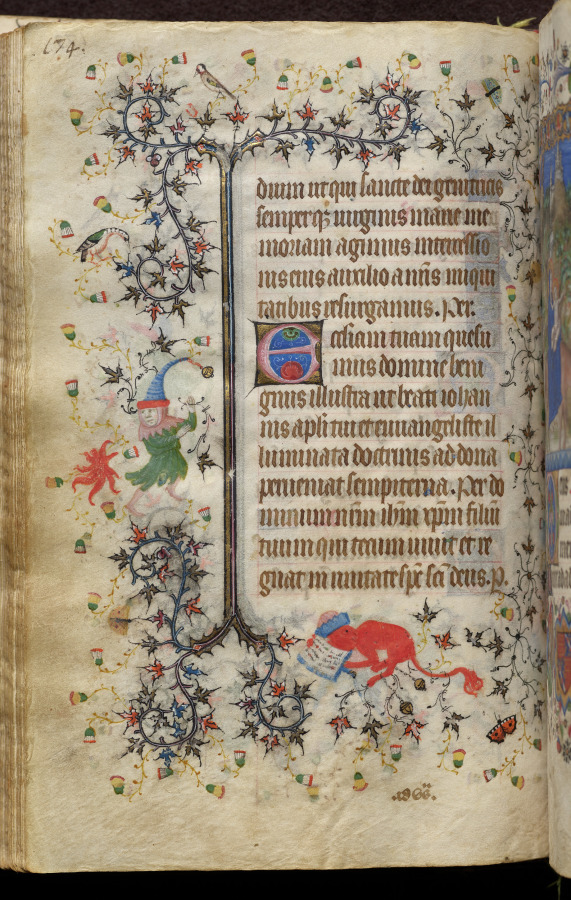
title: Hours of Charles the Noble, King of Navarre (1361-1425): fol. 87v, Text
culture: France, Paris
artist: Master of the Brussels Initials and Associates (French)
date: c. 1405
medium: ink, tempera, and gold on vellum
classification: Bound Volume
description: This precious volume was obviously highly prized by its owner, the French-born King of Navarre, who had his coat of arms painted on no less than twenty folios. Rather than directly commissioning this manuscript from a specific workshop, it seems that Charles the Noble acquired his book of hours -- perhaps ready-made for the luxury market -- while on a trip to Paris in 1404-05. A collaborative effort, six painting styles are evidenced within the pages of this codex, those of two Italians, two Frenchmen, and two Netherlanders. The painter who was responsible for the planning and decoration of the book, and who produced seventeen of the large miniatures, was a Bolognese artist known as the Master of the Brussels Initials. His principal assistant, responsible for most of the borders, was a Florentine who signed his name "Zecho" da Firenze on folio 208 verso.